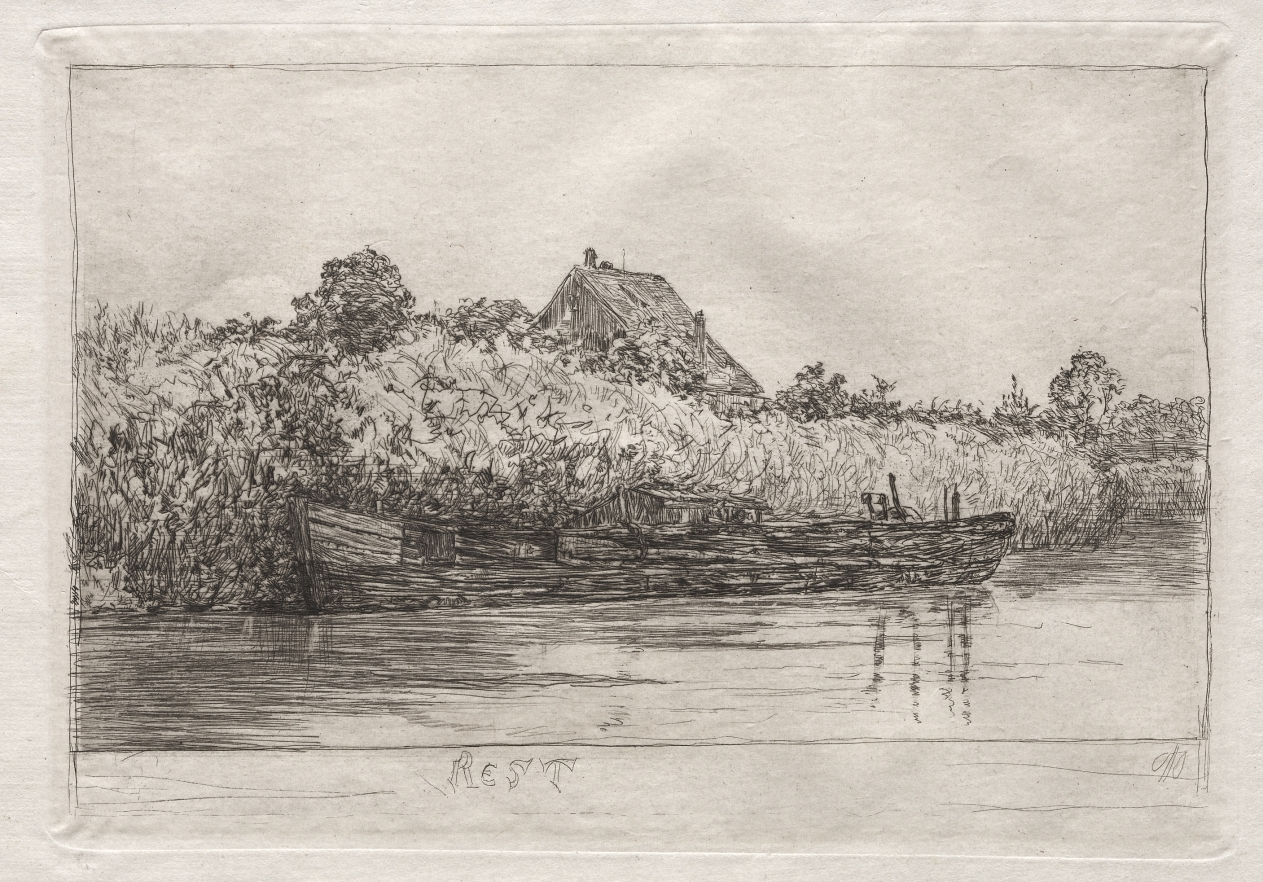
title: Rest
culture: America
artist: Otto H. Bacher (American, 1856–1909)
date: 1879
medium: etching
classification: Print